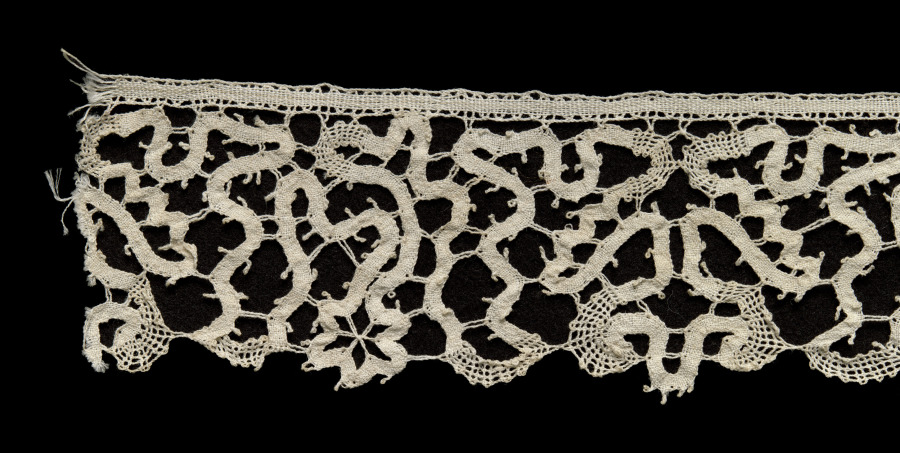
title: Lace Edging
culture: France or Flanders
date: early 1900s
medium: Bobbin lace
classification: Lace